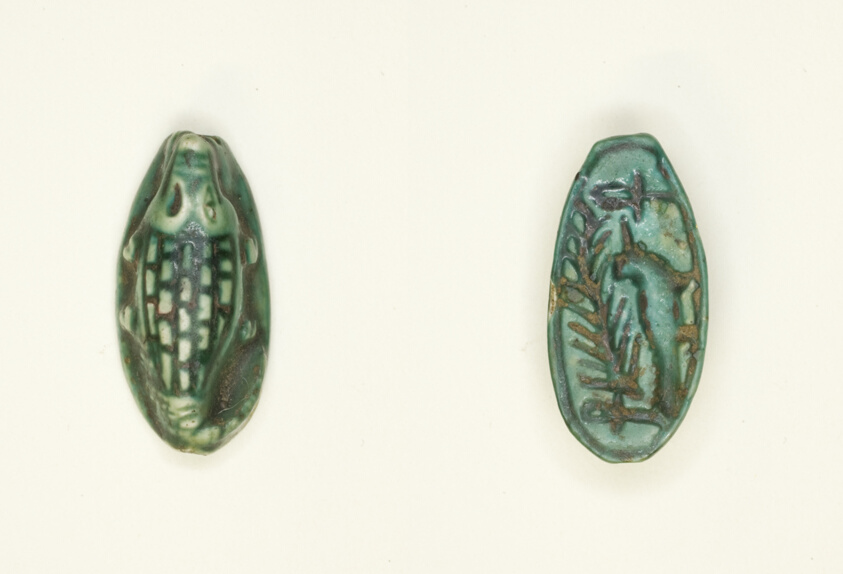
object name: Costume and Accessories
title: Scaraboid: Crocodile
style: new kingdom, egyptian, ancient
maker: Egyptian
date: New Kingdom, Dynasties 18–20 (about 1550–1069 BCE)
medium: Glazed steatite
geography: Egypt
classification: scaraboids; amulet; ancient art; costume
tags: crocodiles, Hieroglyphs